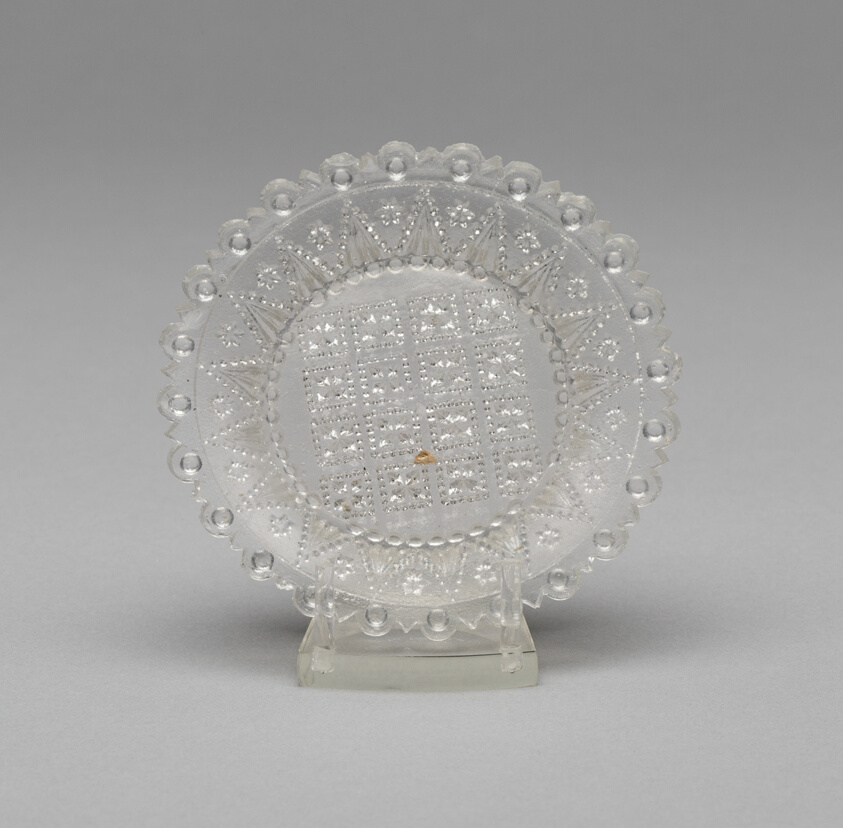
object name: Glass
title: Cup plate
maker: Artist unknown (American, 19th century); Probably Pittsburgh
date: 1830–35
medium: Pressed glass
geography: Pittsburgh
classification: plate (general, dish); glass; american decorative arts; american arts; decorative arts